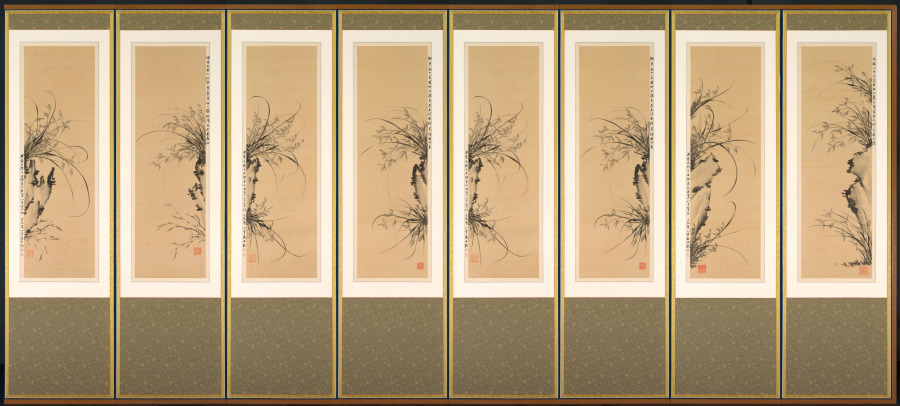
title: Orchids and Rocks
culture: Korea, Joseon dynasty (1392–1910)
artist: Yi Ha-eung (Korean, 1820–1898)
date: 1897–98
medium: Eight-panel folding screen; ink on silk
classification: Painting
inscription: Translation: [I] painted for the high minister Yangwon. [I] humbly request your corrections and advice [on my painting]. [By] an eighty-year old gentleman of rocks.)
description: Yi Ha-eung (1820−1898), the artist of this eight-panel folding screen, was one of the most influential men in late 19th-century Korea. Acting as the regent for his son, King Gojong (1852−1919), who ascended the throne at the age of thirteen, Yi ruled Korea from 1866 to 1873. In addition to his illustrious political career, Yi was also recognized as one of the most celebrated artists who led the revival of literati art in late 19th-century Korean art. In particular, he was recognized as the master of orchids, one of the “Four Gentlemen” (plum, orchid, chrysanthemum, and bamboo) themes. Solely relying on monochrome ink, Yi depicted the curvilinear silhouettes of cymbidium orchid leaves dramatically hanging down from cliffs. Growing in wilderness and redolent with fragrance, orchids were often associated with the perseverance of principled gentlemen, and thus became one of the most popular subjects of scholar-artists' paintings.On the upper right corner of the far left panel, Yi wrote a short inscription stating that he painted the work at the age of 80.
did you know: The artist of this elegant painting is the formidable politician Yi Ha-eung (1820–1898), who is known for a seclusion policy that aimed to protect Korea and its sovereignty from foreign influences.